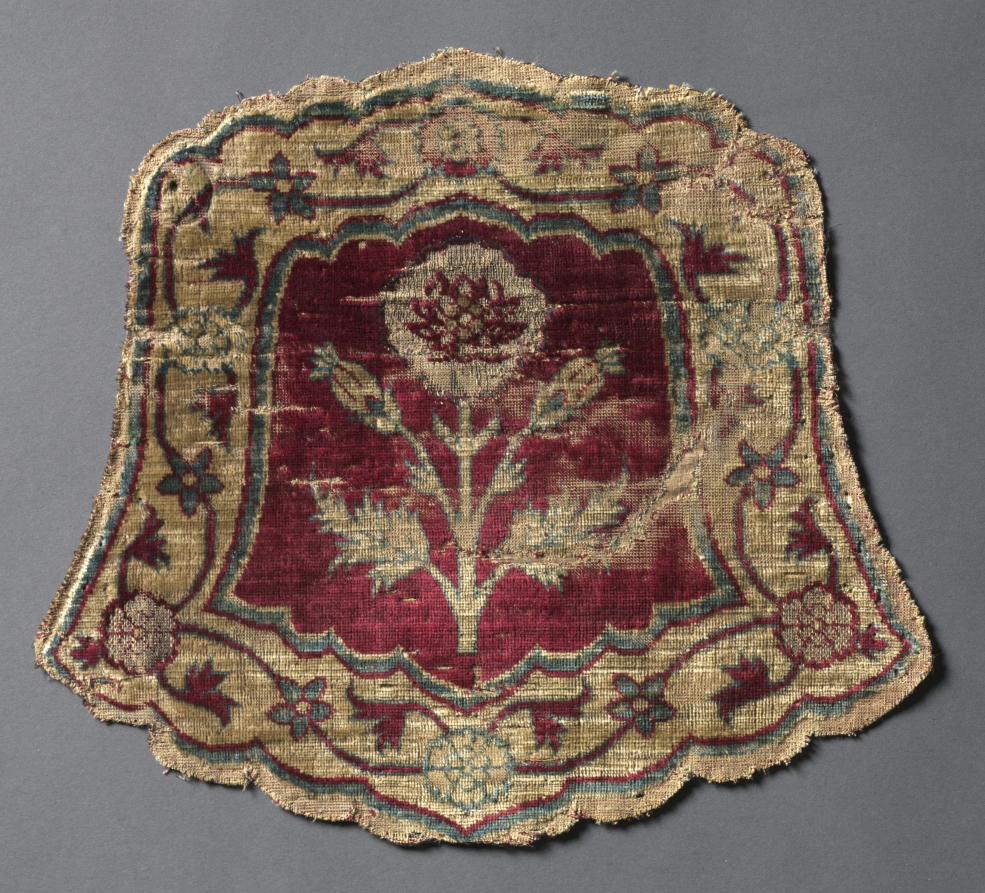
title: Shaped horse trapping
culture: India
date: 1600s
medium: velvet, brocaded and pile warp substitution: silk and gilt-metal thread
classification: Velvet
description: The scrolling floral vines in the border and the combination of gold with imperial crimson resonate with the painted depiction of the textiles that accompany portraits of the emperor. The poppy plant in the center can be identified by the leaves with multiple lacy points and may reference the opium in which Emperor Jahangir indulged daily.